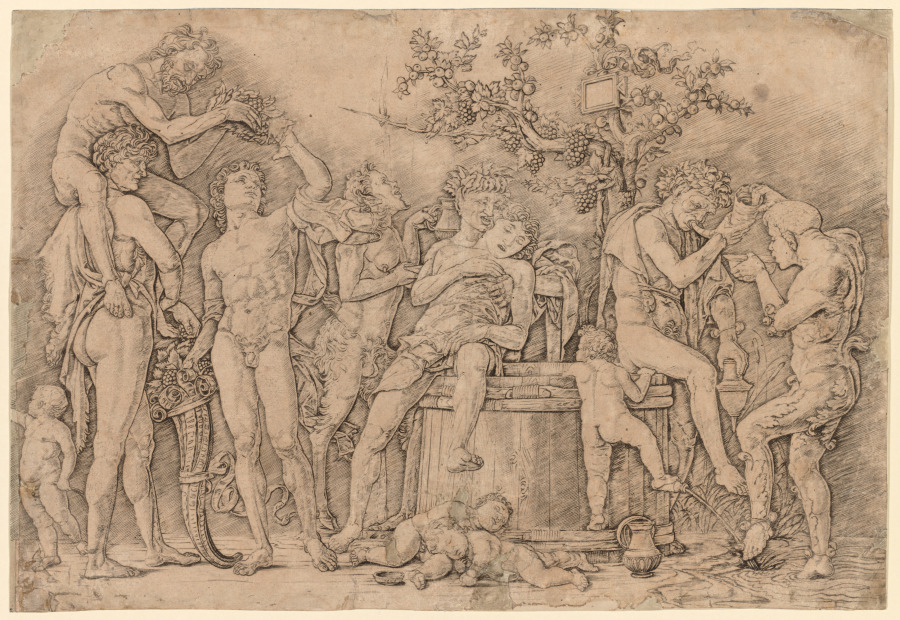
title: Bacchanal with a Wine Vat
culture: Italy, 15th century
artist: Andrea Mantegna (Italian, about 1431–1506)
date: 1470–80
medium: engraving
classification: Print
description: Andrea Mantegna was among the first artists in Italy to produce engravings. His scene of a bacchanalia, a wine-fueled festival of ancient Rome, is composed as if on a shallow stage, attesting to Mantegna’s interest in relief-carved Roman sarcophagi (stone coffins). Standing with his horn of plenty, Bacchus is in control of his senses. The mortals around him falter from too much drink. When Mantegna began making engravings in the 1470s, he was among the first to use the technique to reproduce drawings. Many of Mantegna’s engravings show printing imperfections, the result of a shallowly carved printing plate and ink that did not adhere evenly to the paper.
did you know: Philosophers and moralists cautioned against drinking straight from the vat, because, as Bacchus's exalted pose suggests, only a god could handle such an intoxicating drink. Mere mortals usually mixed their wine with water until the 1800s.